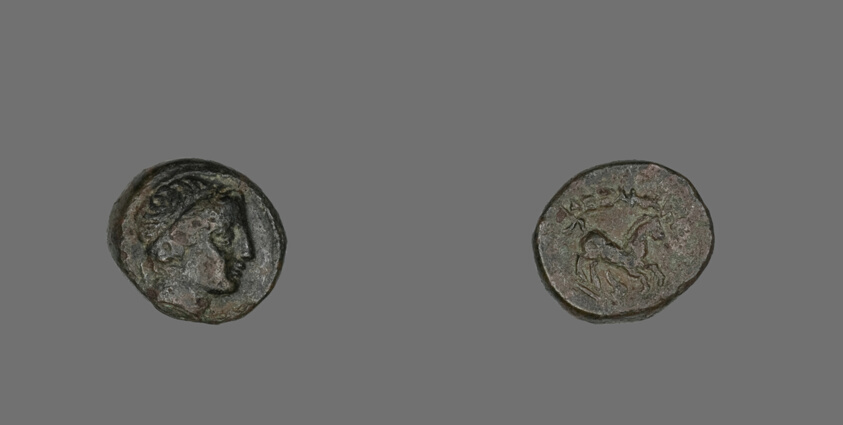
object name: Coin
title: Coin Depicting the God Apollo (?)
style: greek, ancient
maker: Greek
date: 336-323 BCE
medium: Bronze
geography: Greece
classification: coin; ancient art; struck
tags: gods (deities), horses